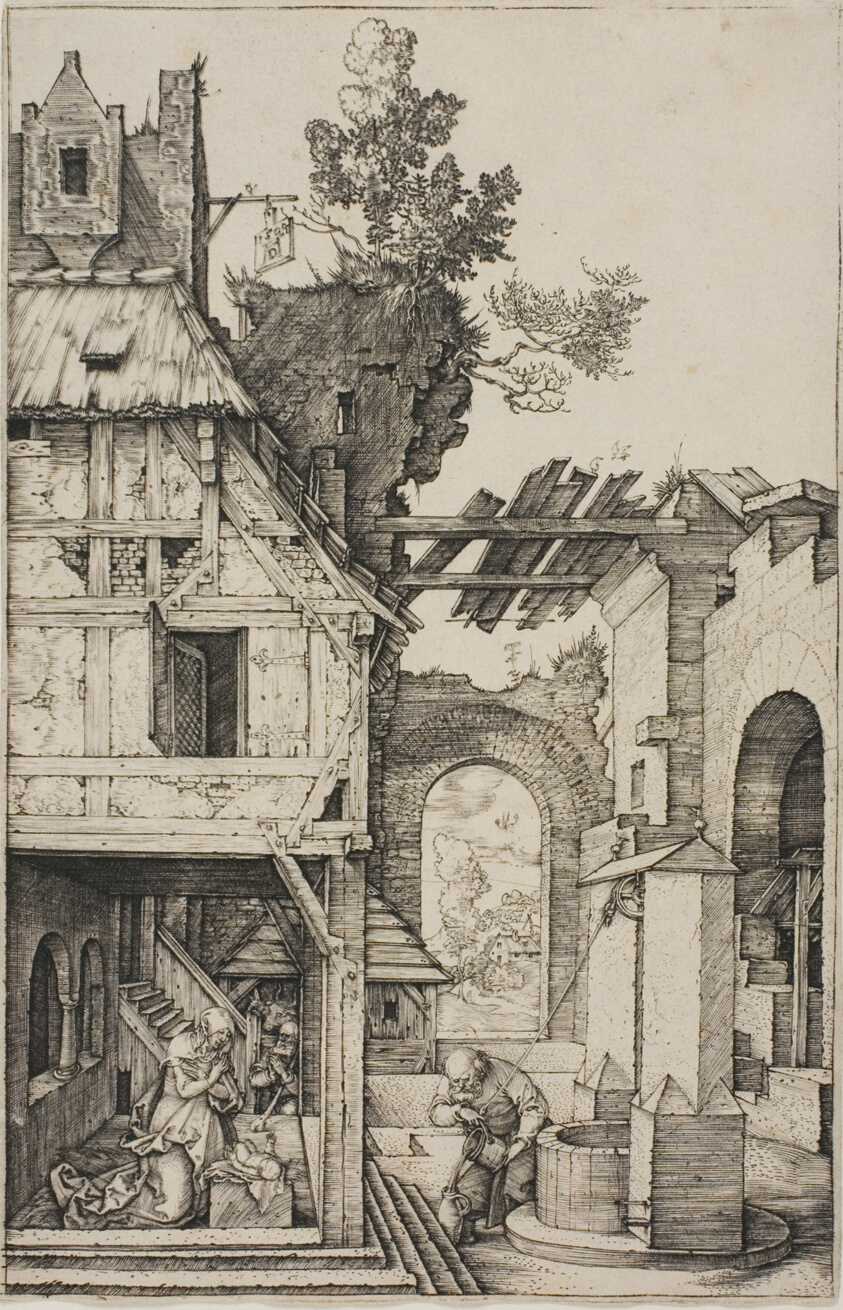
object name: Print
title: Nativity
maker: Albrecht Dürer (German, 1471-1528)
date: 1504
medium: Engraving in black on ivory laid paper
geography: Germany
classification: engraving; print; prints and drawing; paper